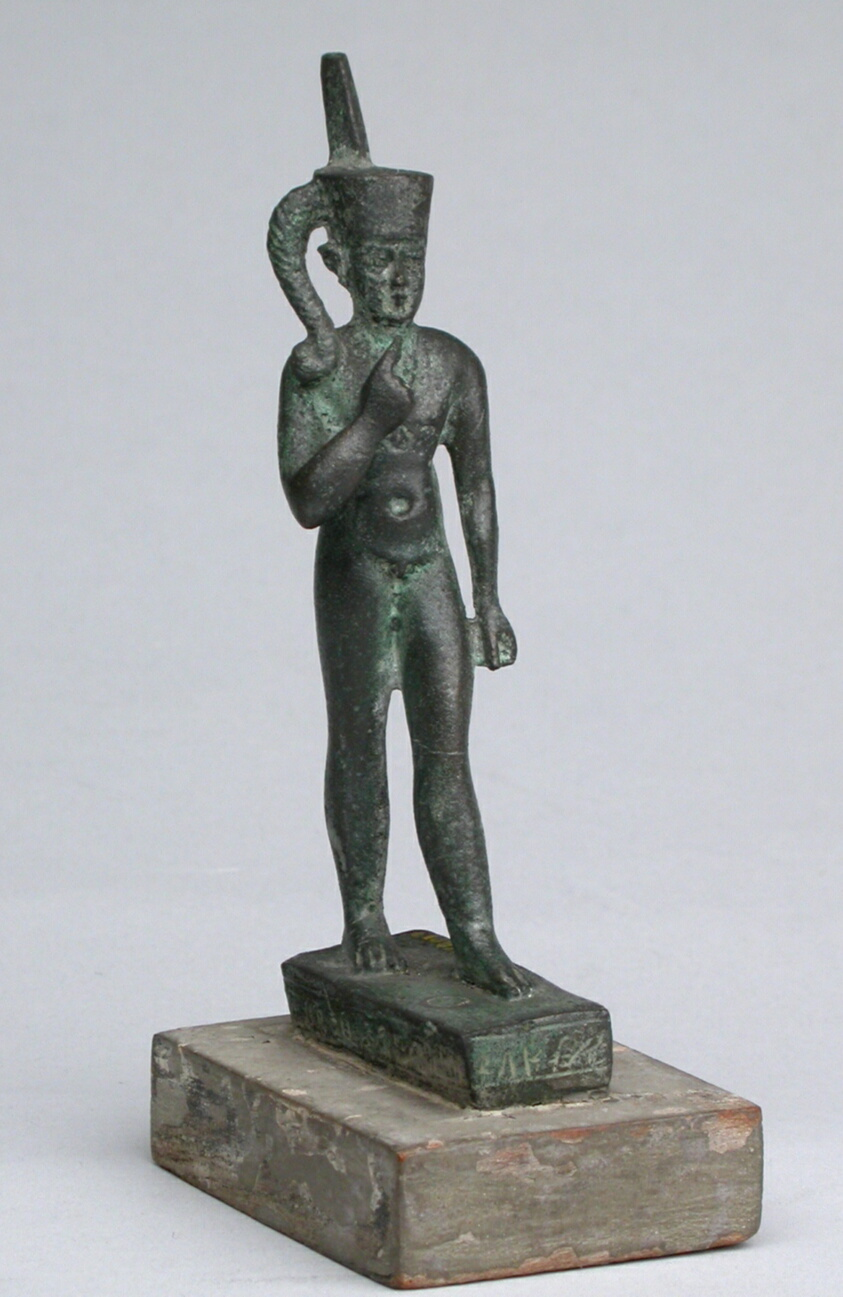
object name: Sculpture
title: Statuette of the God Harpocrates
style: egyptian, ancient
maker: Egyptian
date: Late Period–Ptolemaic Period (664–30 BCE)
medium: Bronze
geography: Egypt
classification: statuette; bronze; metal; sculpture; ancient art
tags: gods (deities), children